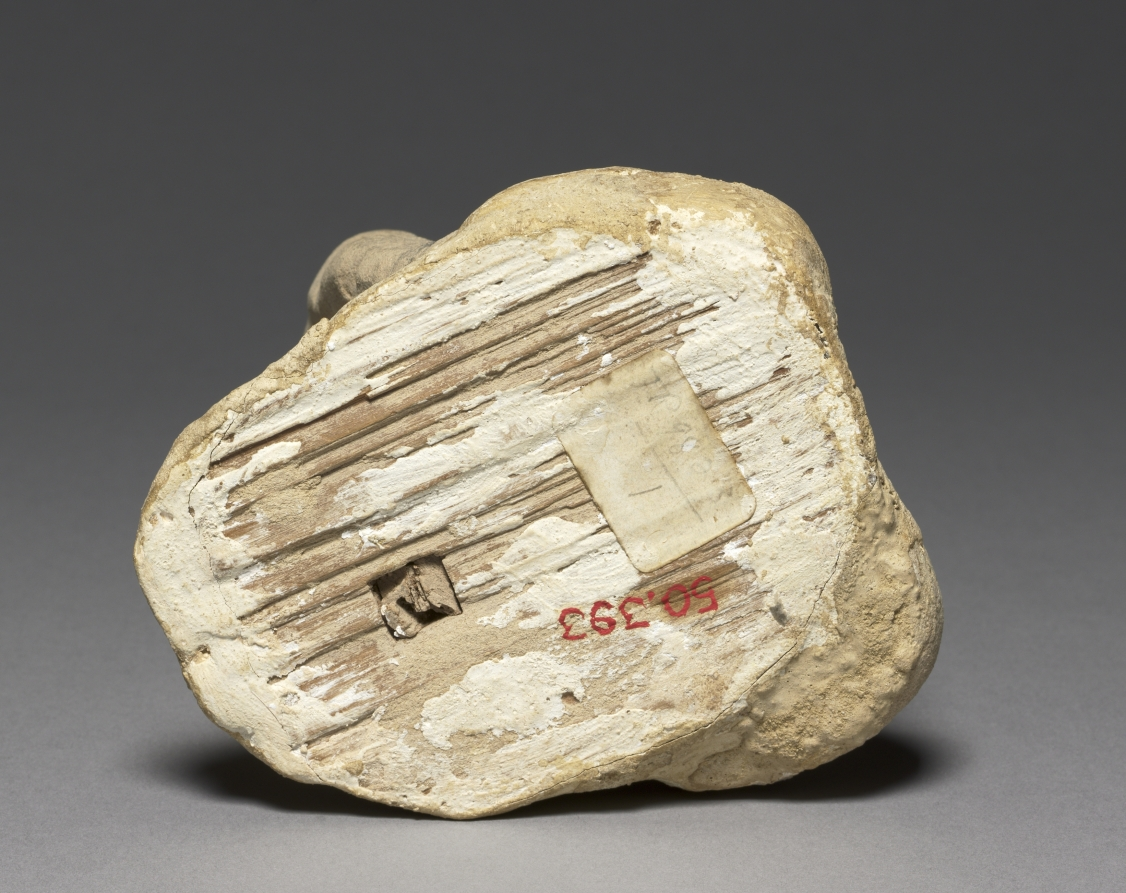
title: Woman from an Audience Scene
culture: Japan, Asuka period (538-710) to Nara period (710-94)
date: mid-600s to early 700s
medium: unfired clay with color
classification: Sculpture